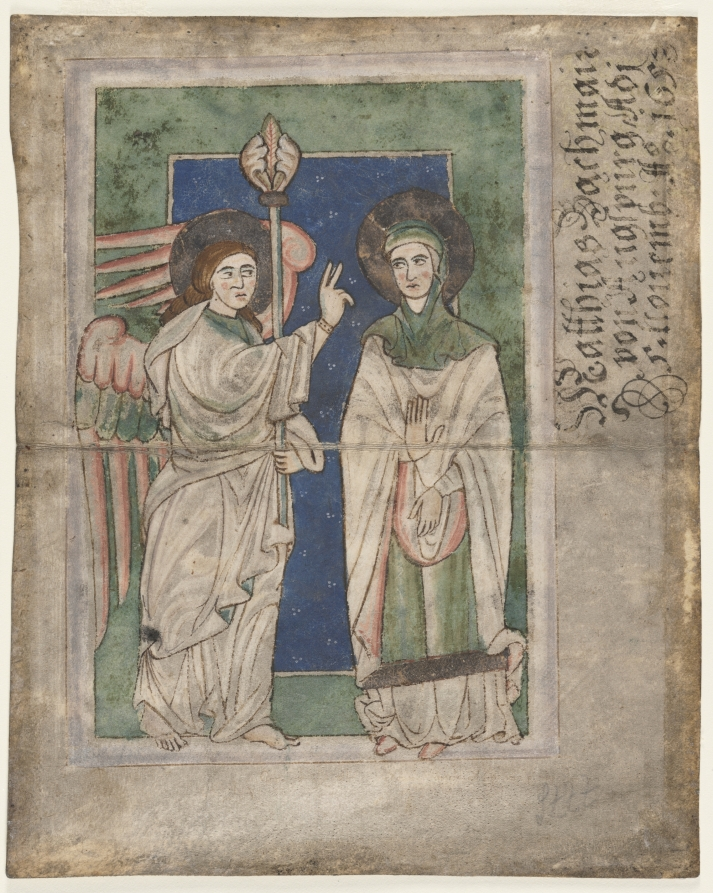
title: Leaf from a Psalter(?): Annunciation (recto)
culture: Germany, Bavaria (possibly Prufening or Augsburg), 13th century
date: early 1200s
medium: ink and tempera on parchment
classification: Manuscript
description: Psalters were commonly used in monasteries and convents during the Middle Ages; the exact origin of this detached psalter leaf, however, is unclear. Stylistically it relates to a small number of manuscripts produced at Prüfening Abbey near Regensburg and to other examples associated with scriptoria at Augsburg from the early 1200s. Though its immediate source remains obscure, it is certainly South German.